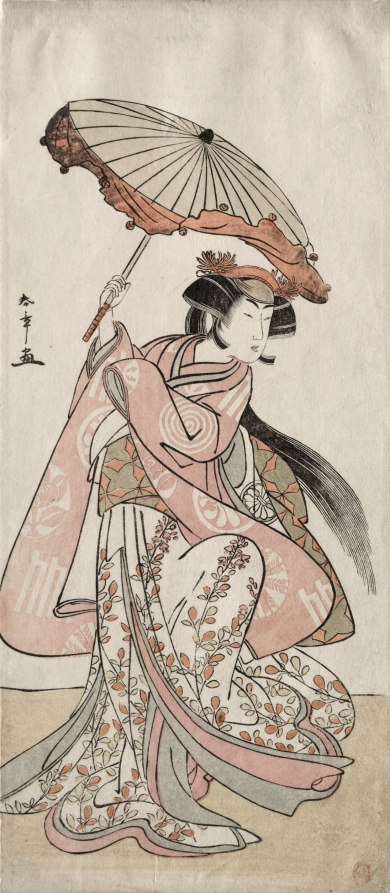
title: The Actor Segawa Kikunojo II Dancing with a Parasol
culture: Japan, Edo period (1615–1868)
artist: Katsukawa Shunshō (Japanese, 1726–1792)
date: late 1770s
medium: color woodblock print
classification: Print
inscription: Signature: Shunsho ga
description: The dancer's robe is decorated with the crests of three kabuki actors: Ichimura Uzaemon IX, Nakamura Nakazo I, and Nakamura Tomijuro I.